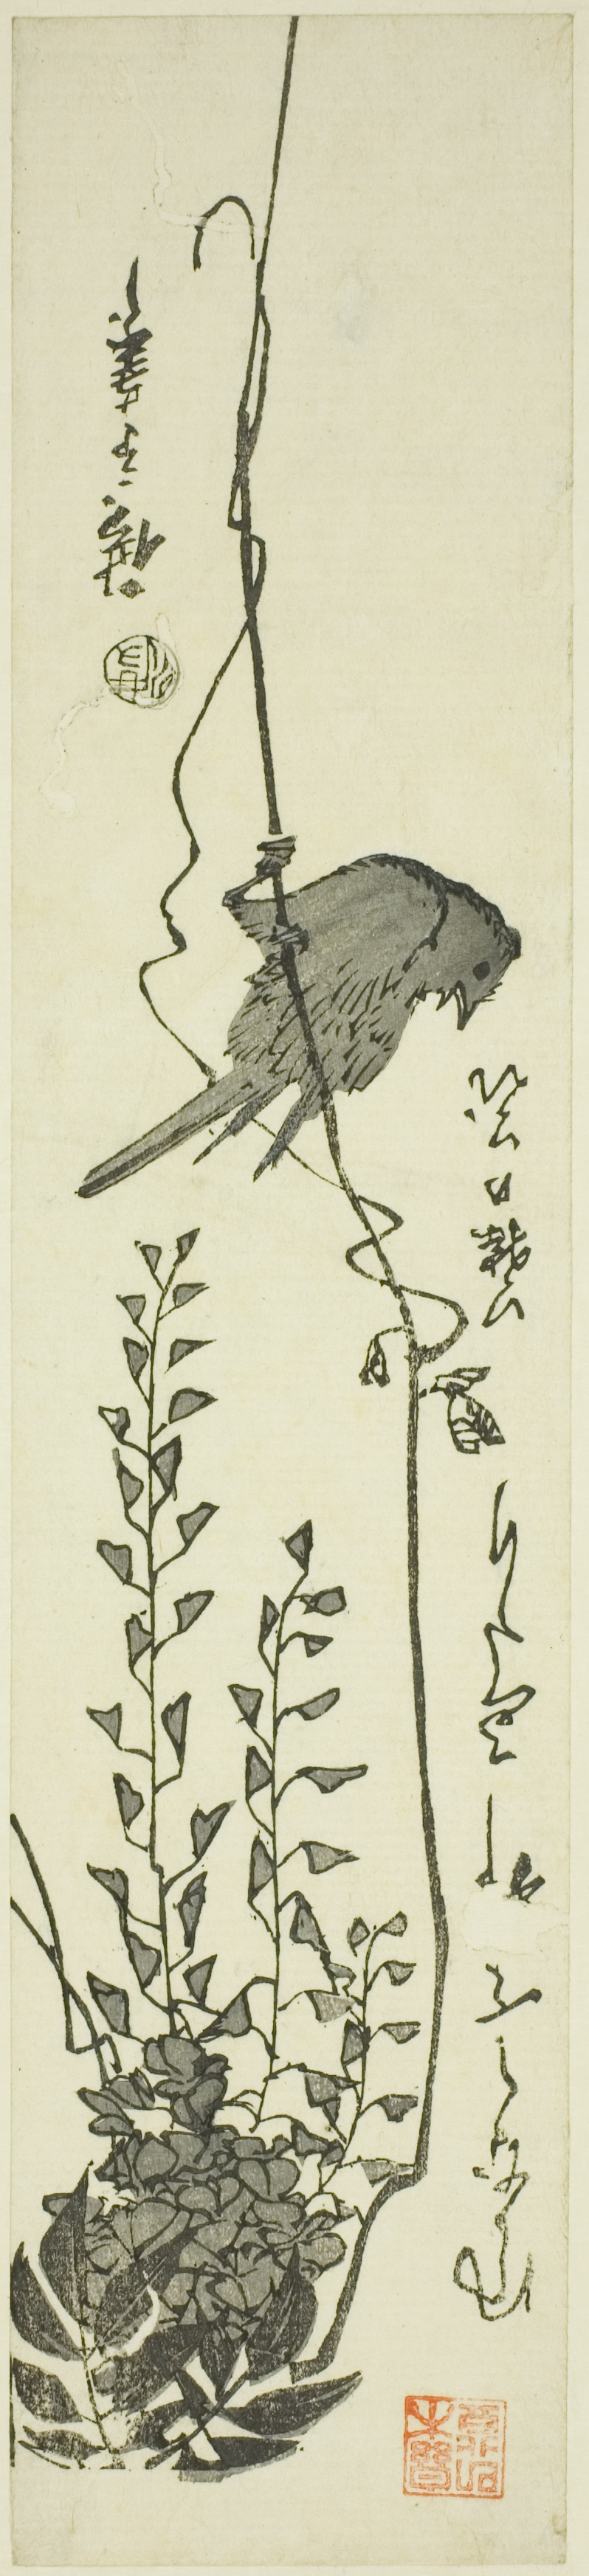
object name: Print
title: Canary and wisteria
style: Japanese (culture or style)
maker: Utagawa Hiroshige 歌川 広重; Japanese, 1797-1858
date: mid–1840s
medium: Color woodblock print; kotanzaku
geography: Japan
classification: woodblock print; print; asian art